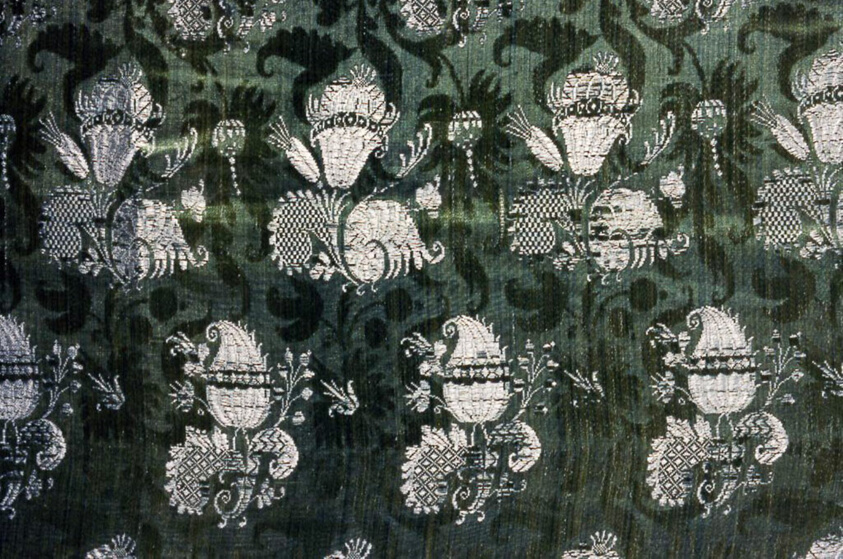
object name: Textile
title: Panel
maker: France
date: c. 1700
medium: Silk, integrated compound weave of complementary wefts in plain, satin, and twill interlacings; self-patterned by ground weft floats in satin weave areas; double cloth formed in pattern areas with plain weave on face and twill weave on reverse face; two panels joined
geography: France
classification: textile; weaving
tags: flowers, foliage